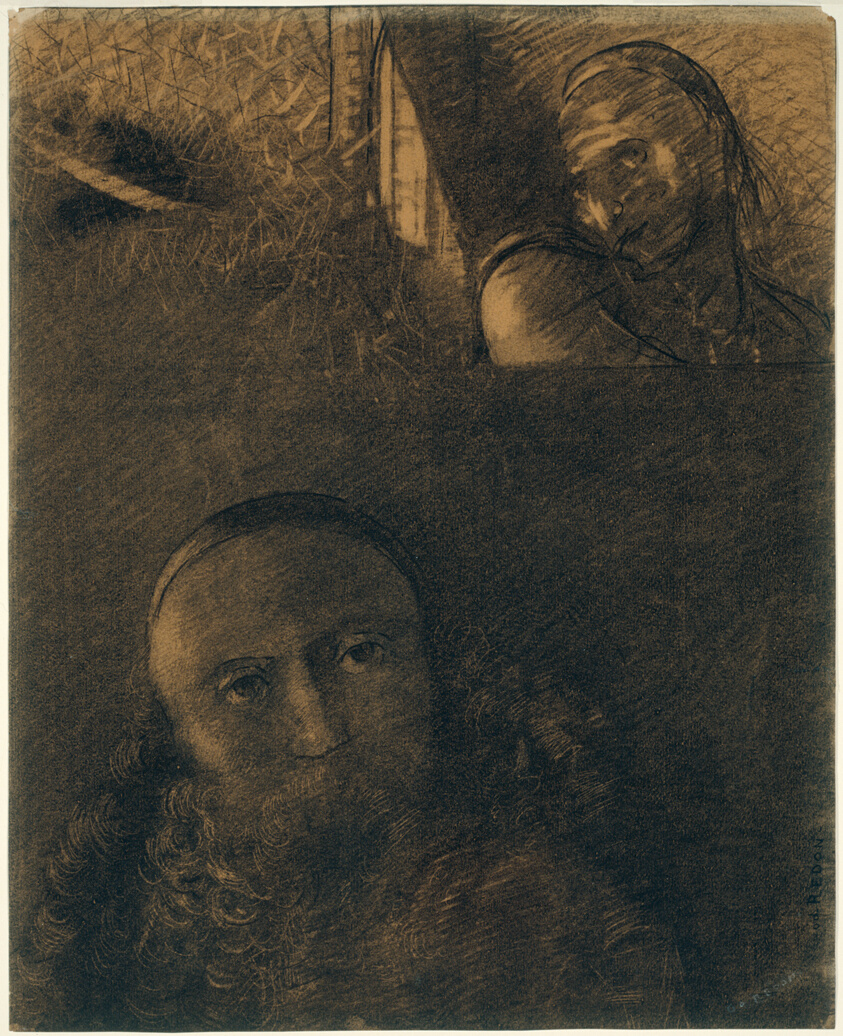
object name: Drawing and Watercolor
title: Faust and Mephistopheles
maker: Odilon Redon (French, 1840-1916)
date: 1880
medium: Various charcoals, with wiping, stumping, erasing, and incising, on cream wove paper altered to a golden tone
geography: France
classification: charcoal; drawings (visual works); prints and drawing; paper